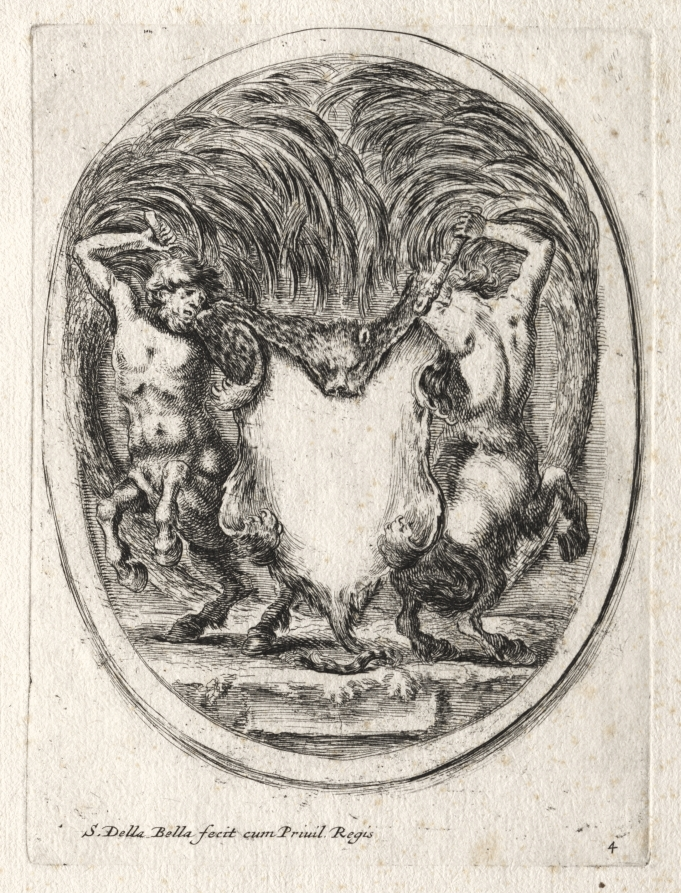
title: New Model for a Cartouche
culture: Italy, 17th century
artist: Stefano Della Bella (Italian, 1610–1664)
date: 1647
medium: etching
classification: Print